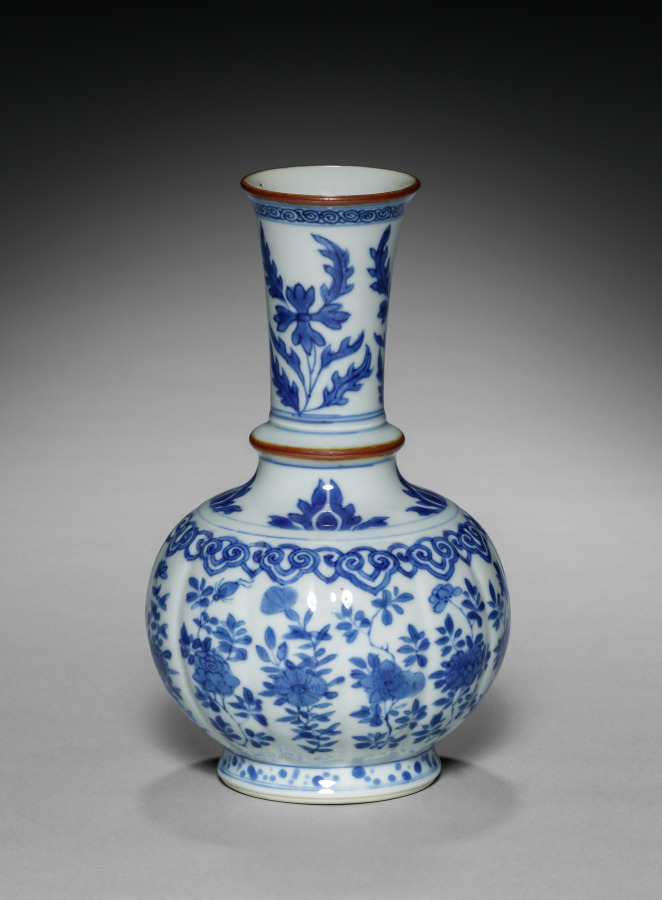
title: Lobed vase with underglaze cobalt blue decoration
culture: China, Jiangxi province, Jingdezhen kilns, Qing dynasty (1644-1911), Kangxi reign (1661-1722)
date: 1661–1722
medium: Porcelain with underglaze cobalt blue decoration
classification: Ceramic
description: Underglaze blue-and-white designs reached their highest painterly quality during the reign of the Kangxi emperor (1662–1722). Porcelain decorators achieved a level of artistic and technical sophistication that rivaled that of professional painters. Blue-and-white porcelains in brilliant cobalt blue catered to the taste of the educated class, the court, and foreign markets. Notice the blue-and-white porcelains in Pierre Bonnard’s painting Fruit and Fruit Dishes (CMA 2020.100); such ceramics on a French dining table would have been inspired by Chinese porcelains of this type.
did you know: The underside shows the mark of a feather, done in blue underglaze.